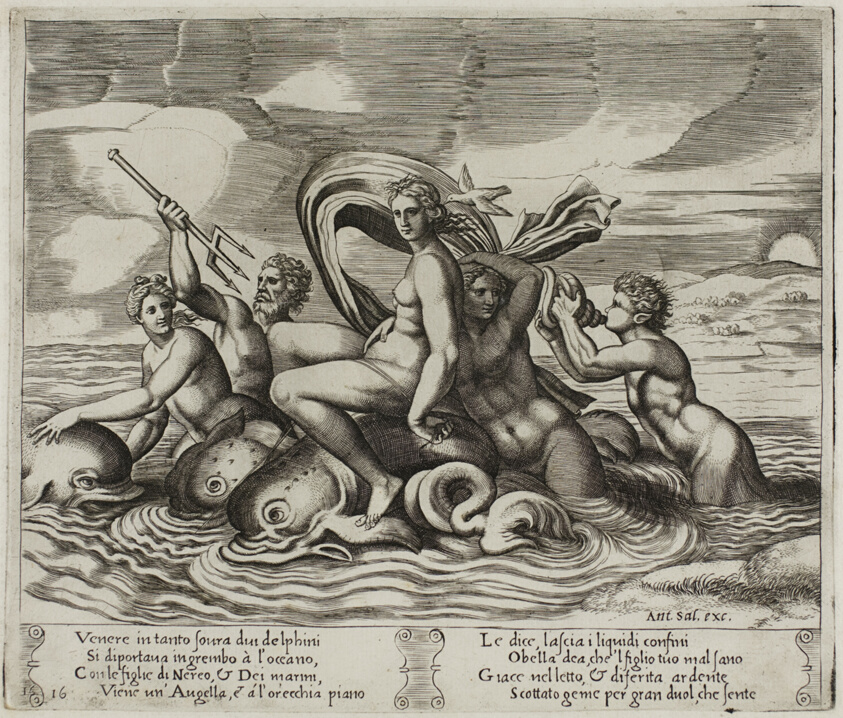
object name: Print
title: Psyche Served in Her Bath by Nymphs She Cannot See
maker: Agostino dei Musi (Italian, c. 1490-after 1536); after Michiel Coxcie I (Flemish, 1499-1592); in turn, inspired by Raffaello Sanzio, called Raphael (Italian, 1483-1520)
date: 1530/40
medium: Engraving in warm brown ink on cream laid paper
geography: Italy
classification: engraving; print; prints and drawing